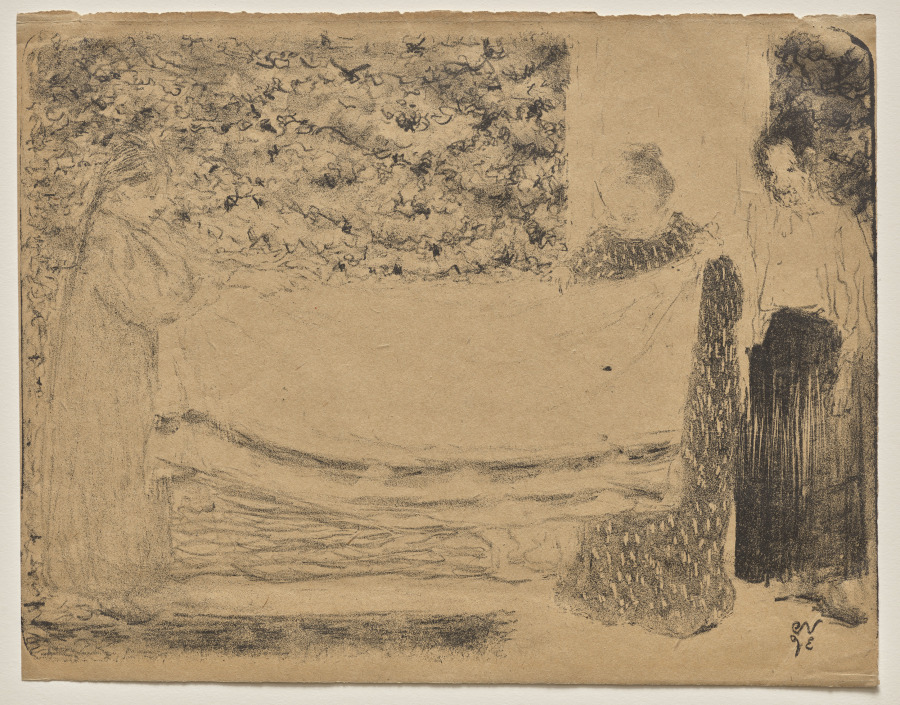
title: Folding the Linen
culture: France, 19th century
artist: Édouard Vuillard (French, 1868–1940)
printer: Edward Ancourt (French, 1841–1898?)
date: 1893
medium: lithograph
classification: Print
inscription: Signed with artist's monogram in the stone, lower right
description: Much of Vuillard’s work was focused on the depiction of contemporary domestic Parisian life. His mother, widowed when the artist was a young boy, worked as a textile designer and dressmaker to support her family, and Vuillard, who lived with her until her death in 1928, was deeply influenced by his experiences of family life. He frequently used his mother and sister as models, depicting them in the midst of household tasks, such as folding laundry.